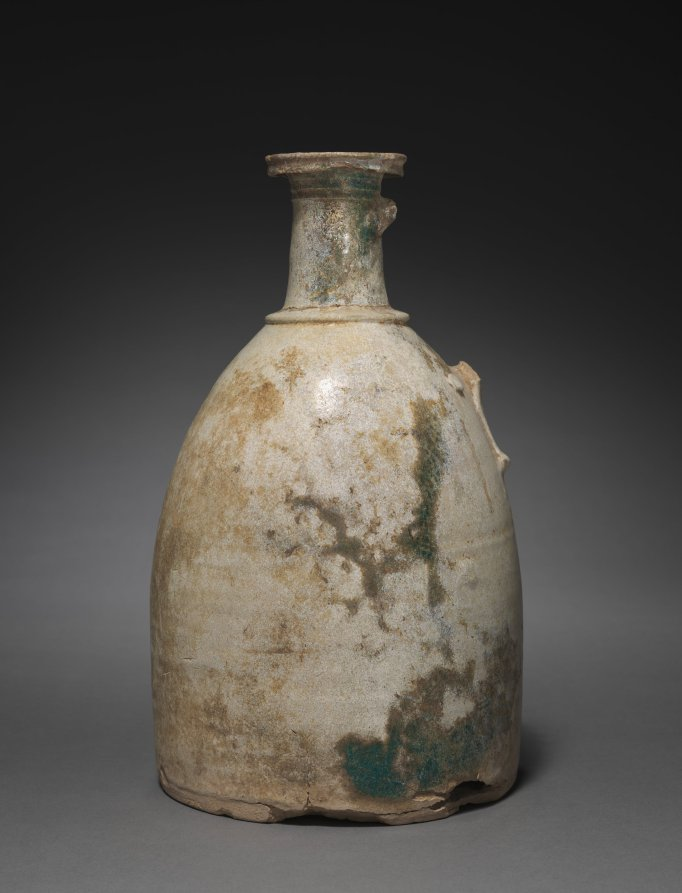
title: Jar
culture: Parthian Empire (247 BCE–224 CE)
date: 1–200 CE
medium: terracotta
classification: Ceramic